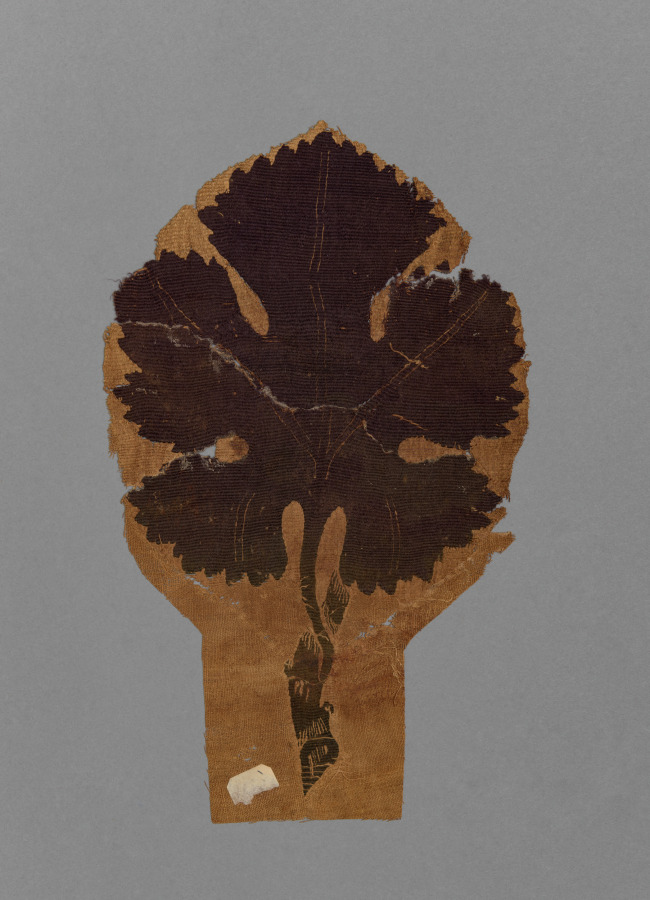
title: Grape Leaf from a Curtain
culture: Egypt, Byzantine period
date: 400s-500s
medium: weft-faced plain weave with tapestry weave and supplementary weft wrapping; undyed linen and dyed wool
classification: Textile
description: This deep-purple grape leaf once decorated the plain linen ground of a curtain. It probably refers to Dionysus, the classical god of wine, whose cult was popular in Egypt through the 6th century.